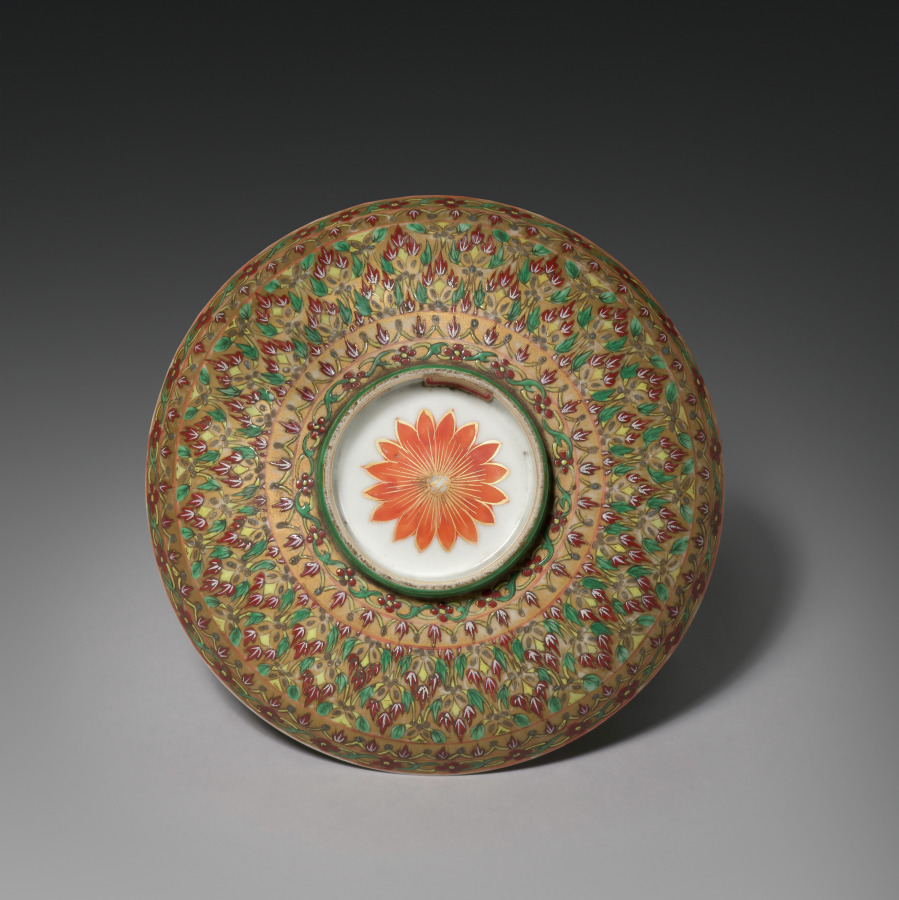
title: Chow Bowl (lid)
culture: Siam, 18th century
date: 1700s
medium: porcelain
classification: Metalwork